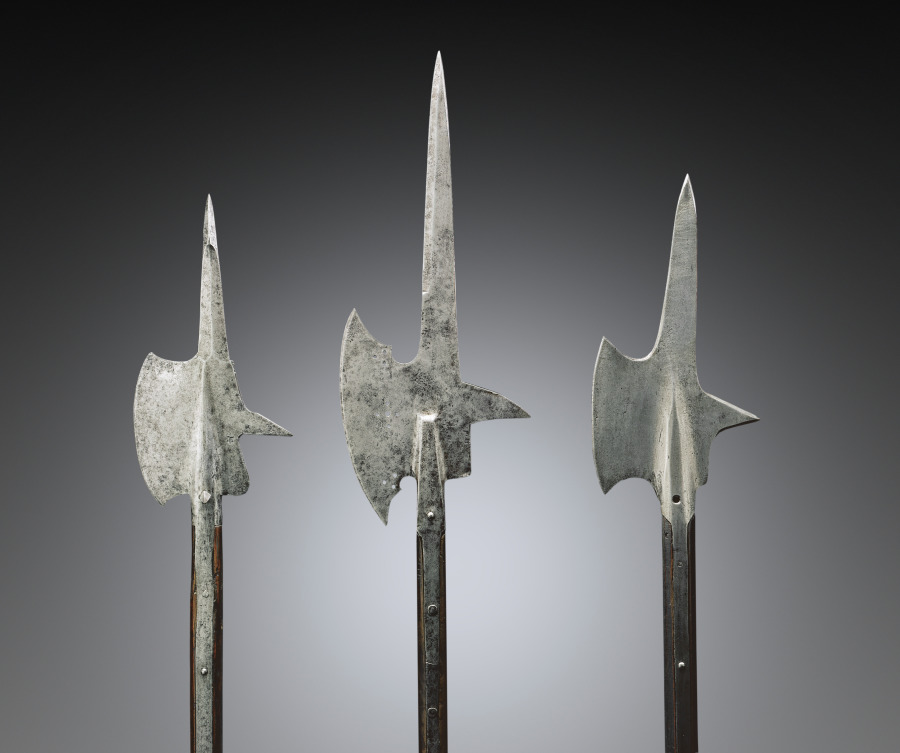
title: Halberd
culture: Switzerland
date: 1600s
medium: steel; new rectangular wood haft with planed corners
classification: Arms and Armor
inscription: IP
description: The halberd was a staff weapon favored by European infantries (foot soldiers) of the 1400s and 1500s for its versatility and deadly effect. The word halberd comes from the German words Halm (staff) and Barte (axe). The halberd is, in fact, an axe that served multiple functions: the axe blade was used for hacking, the spike for thrusting, and the beak for piercing plate armor or for pulling a knight from his saddle. The halberd was used by shock troops (those who lead an attack) and by Swiss and German mercenaries. After about 1550, the halberd gradually became less functional. Its large blade provided space for coats of arms and insignia. By the late 1500s, the parade halberd had become a ceremonial weapon for palace guards.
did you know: The earliest known mention of the halberd is believed to be by the Swiss poet Konrad von Würzburg (d. 1287) who wrote about them in his History of the Trojan War.